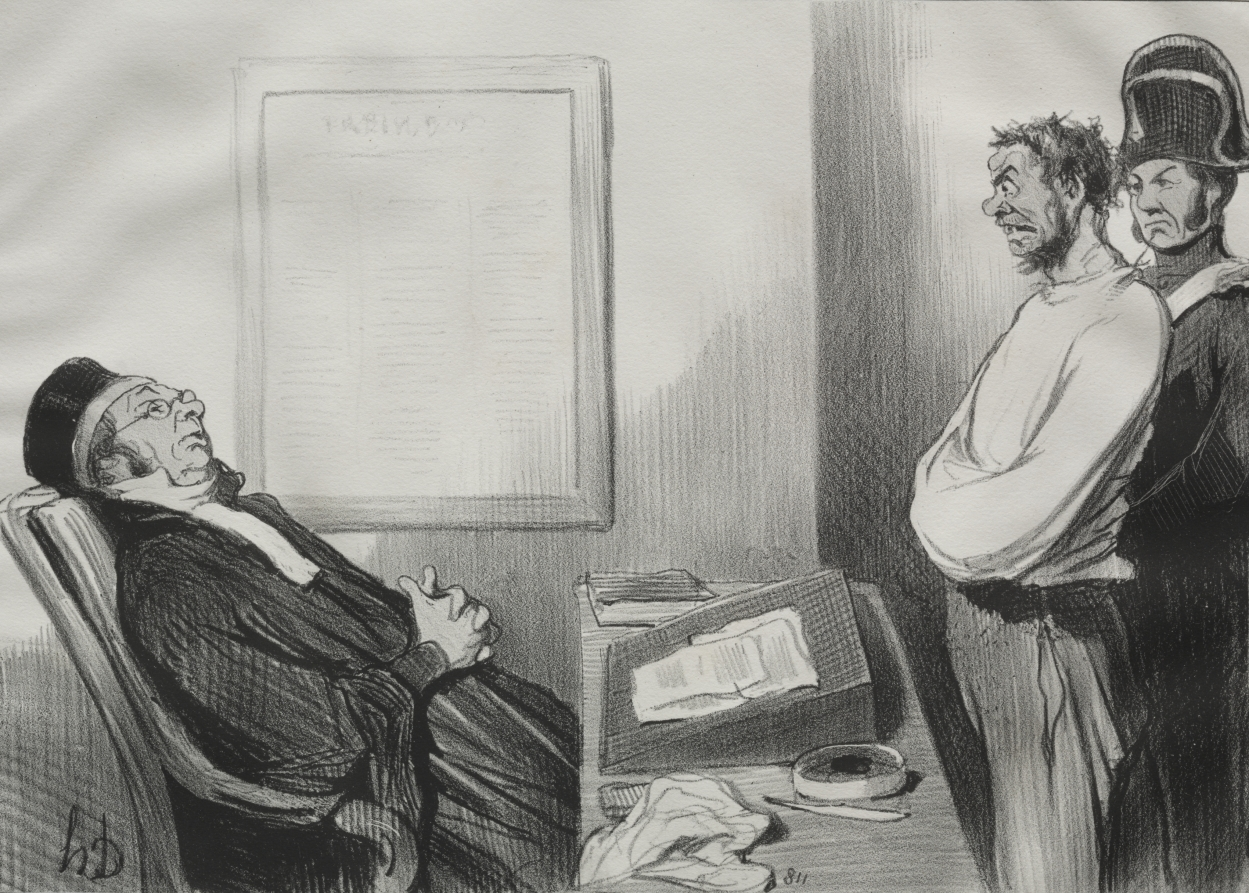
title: You were hungry...that is not a reason...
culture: France, 19th century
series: The Lawyers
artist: Honoré Daumier (French, 1808–1879)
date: 1845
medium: lithograph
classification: Print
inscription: Lower margin, in pencil: H.LD 1862 I / Les Gens de Justice. / (15639) - 14 5/4 x 17 1/4 R - 3" white sheat[?]. / onm[?]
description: This print (with title and captions added) was published in Le Charivari (October 20, 1845) as plate 15 from the series The Lawyers.